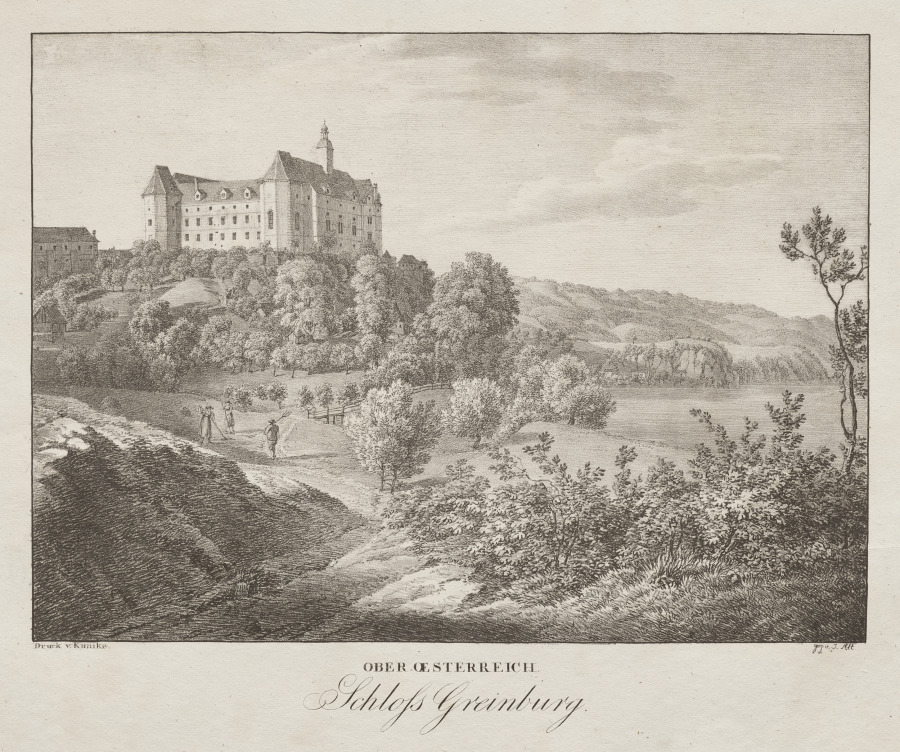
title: Ober-oesterreich, Schloss Greinburg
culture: Austria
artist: Jakob Alt (Austrian, 1789–1872)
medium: lithograph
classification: Print